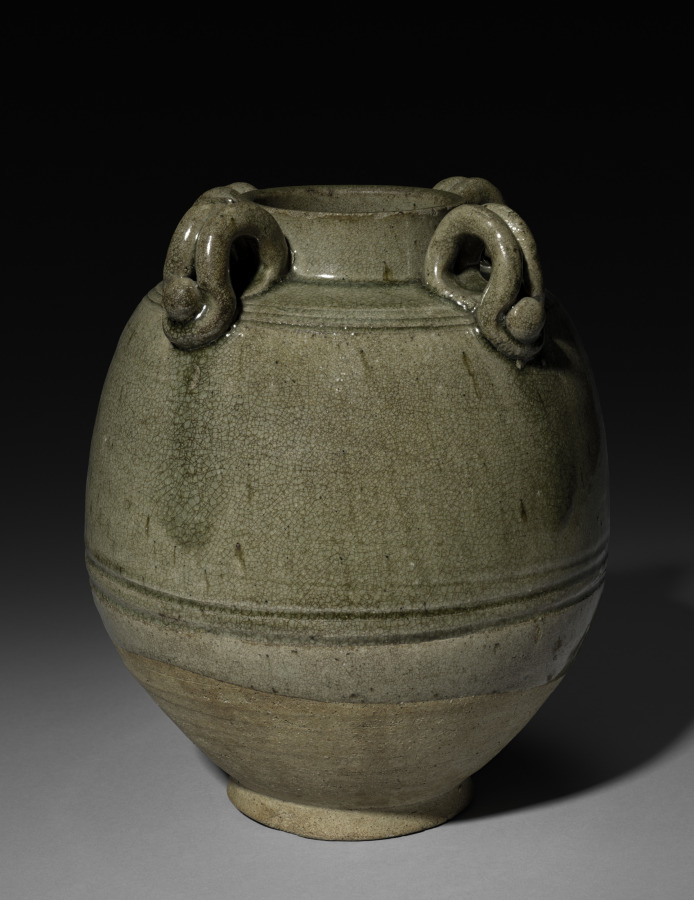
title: Jar with Four Loop-Handles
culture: China, Sui dynasty (581-618) - Tang dynasty (618-907)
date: 500s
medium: glazed gray stoneware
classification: Ceramic